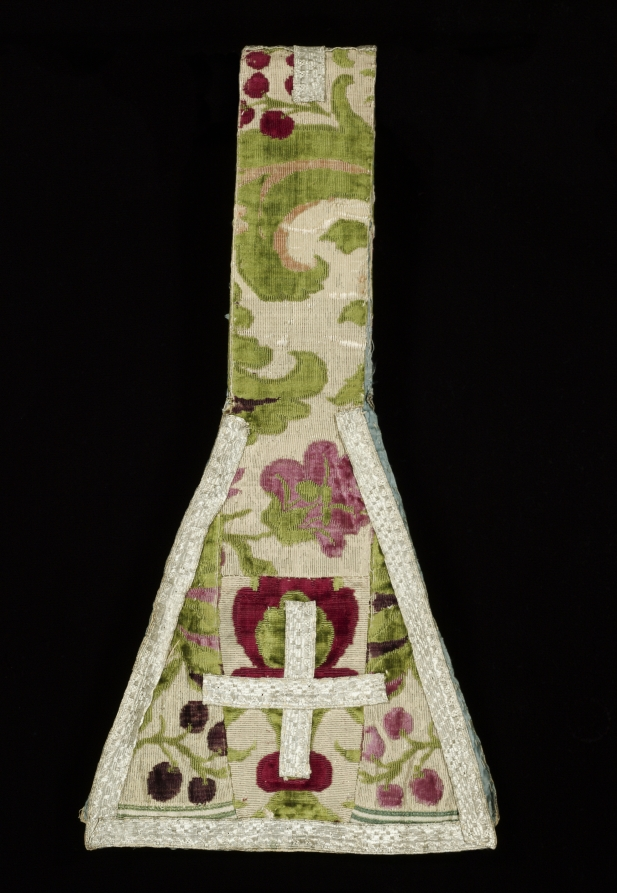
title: Maniple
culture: Italy, Genoa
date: 17th century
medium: cut and uncut silk velvet, metal thread lace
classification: Velvet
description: This sumptuous polychrome velvet displays a central vase with abundant flora and exotic leaves flanking curving blossoming fronds on a gilt-metal thread ground. The pattern was created with five colors of cut and uncut (loops) velvet pile. Only the pile warps for the lush green velvet occur across the entire cloth, while each additional color appears in vertical stripes—crimson, peach, rose, and purple. These widely acclaimed velvets from Genoa were the most colorful woven in Europe. Both the long stole and the shorter maniple are insignia of the office of deacons, priests, and the higher clergy. The stole was worn under a chasuble according to the office and the maniple was hung on the left forearm. The burse is a stiff receptacle in which the folded corporal, a white linen cloth on which the sacred bread and chalice are placed during the Mass, is carried to and from the altar. The upper fabric matches the chasuble, the bottom is a plain silk, and the interior has an obligatory linen lining.